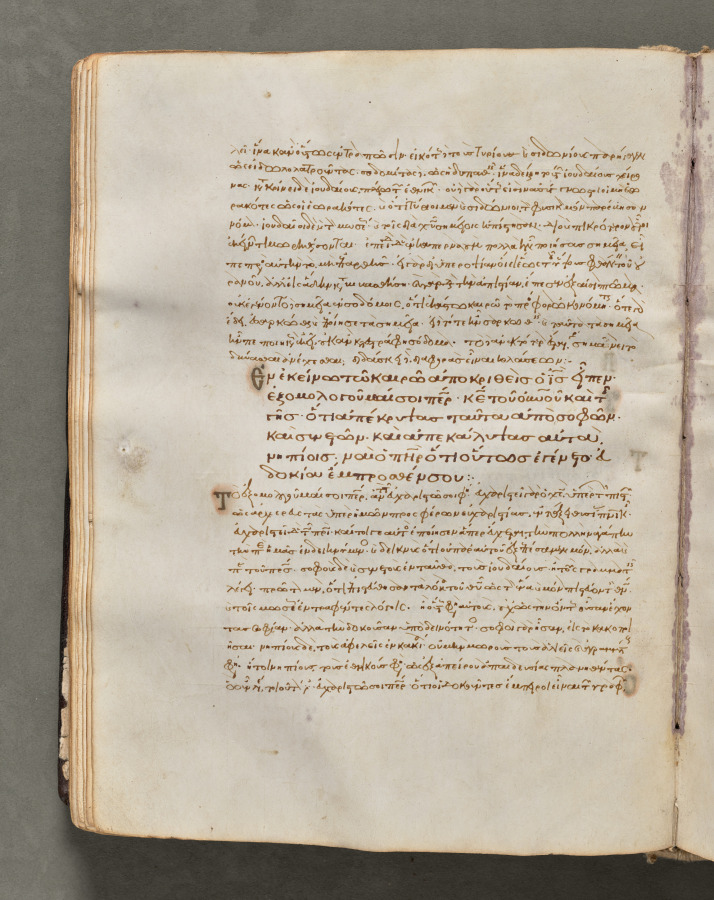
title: Text, folio 49 (verso), from a Gospel Book with Commentaries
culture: Byzantium, Constantinople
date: c. 1000–1100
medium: ink, tempera, and gold on vellum; leather binding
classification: Bound Volume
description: Each of the four gospels in this book opens on a page with brilliantly illuminated borders depicting the author of the text as well as birds-principally peacocks, symbols of the immortality of the soul-and fountains, representing the fountain of life and the salvation of the soul. This volume consists of 428 leaves with texts in Greek. Its level of sophistication suggests that it was probably written and decorated in a monastery in Constantinople.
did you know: Gospel Books were carried in procession through Byzantine churches.